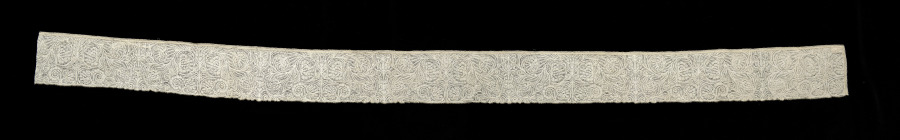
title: Lace Edging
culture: Italy, Abruzzi, Pescocostanzo, l'Aquila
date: 1600s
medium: Linen: bobbin lace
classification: Lace